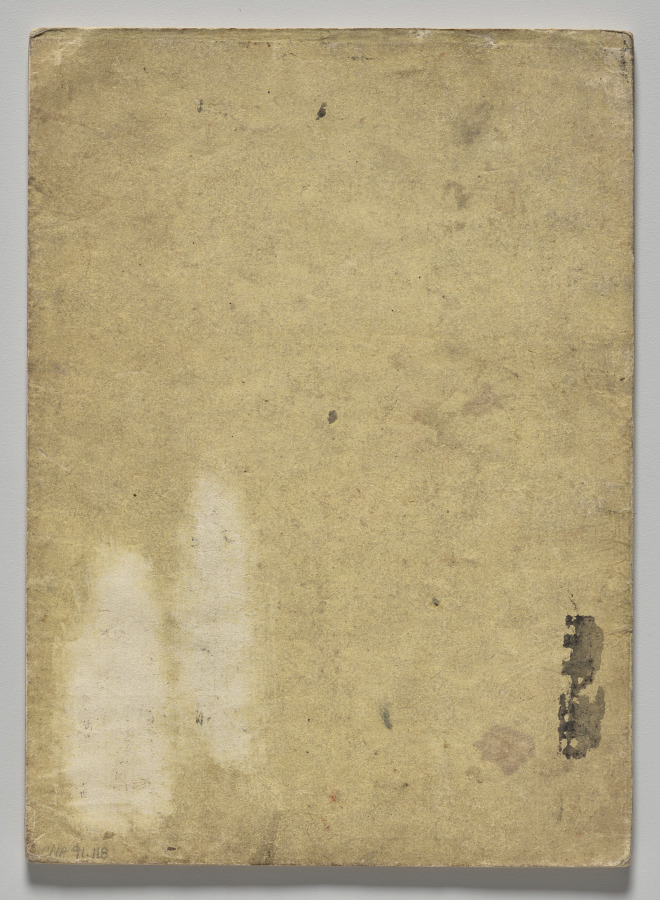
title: The Kōrin Picture Book (Volume 2)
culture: Japan, Edo period (1615–1868)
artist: Nakamura Hōchū (Japanese, d. 1819)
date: 1800s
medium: One of a set of two woodblock printed folding-books; ink and color on paper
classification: Bound Volume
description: Ogata Korin (1658-1716) was one of the most admired artists of Rimpa, or "decorative school painting." These books by the charming later-generation Rimpa artist Hochu record Korin's inventive designs.